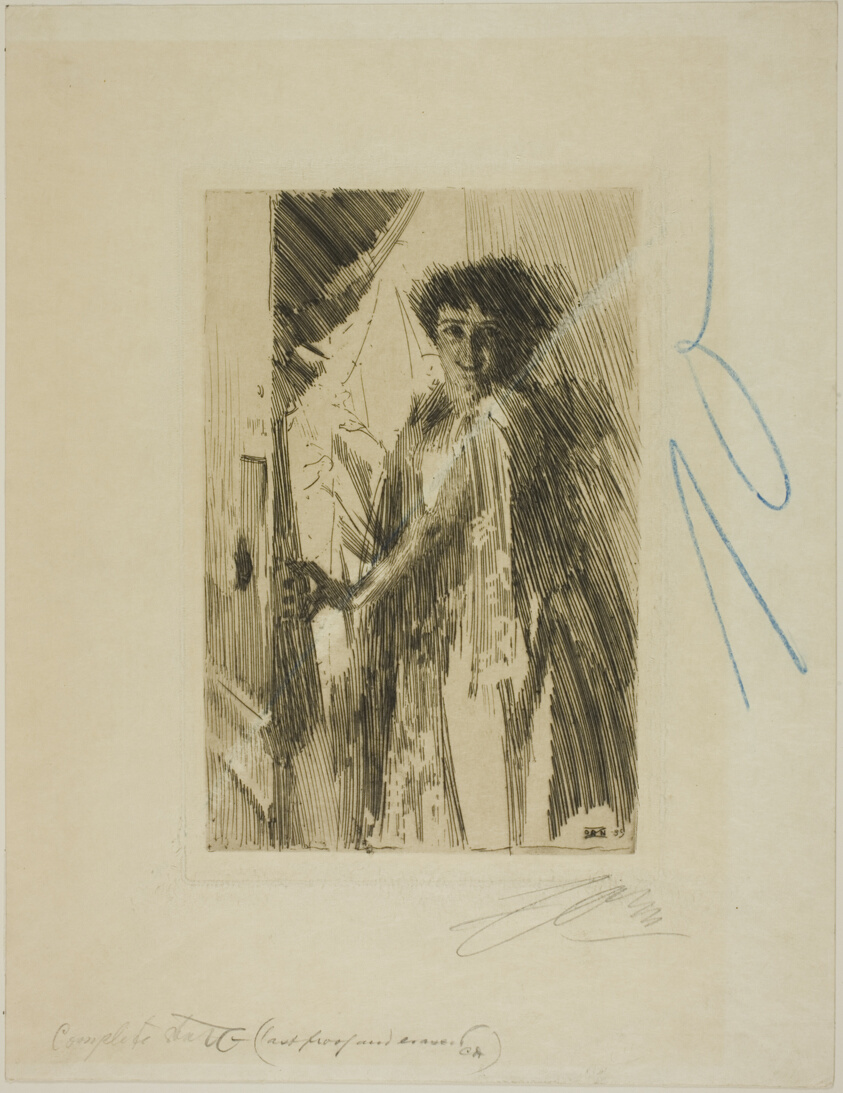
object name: Print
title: Rosita Mauri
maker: Anders Zorn (Swedish, 1860-1920)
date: 1889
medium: Etching on ivory wove paper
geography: Sweden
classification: etching; print; prints and drawing